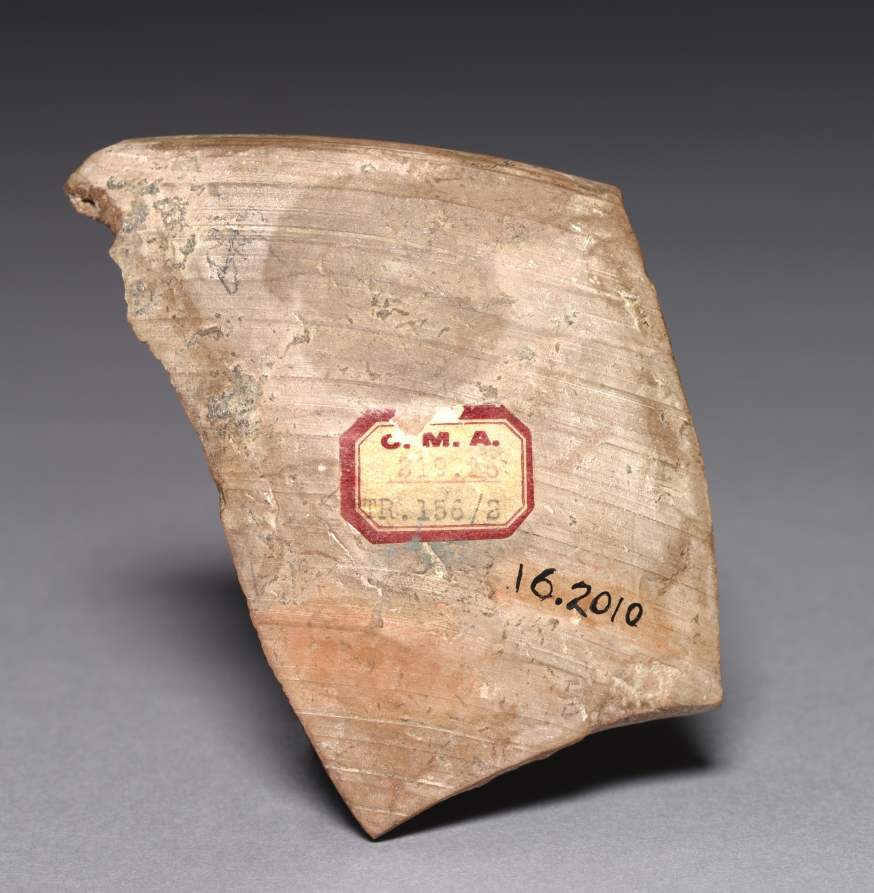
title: Fragment of a Mold for Arretine Bowl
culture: Italy, Roman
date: 27 BCE–14 CE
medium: terracotta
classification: Ceramic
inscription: Signed M. Perenn Tigiani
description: Showing a young man and woman reclining, probably at a symposium, this fragment comes from a mold that would have been used to produce relief-decorated terracotta bowls. For less affluent consumers, such products may have served as affordable alternatives to costlier versions made with precious metal.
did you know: Arretine ware takes its name from Arretium (modern Arezzo, Italy), a major production site.